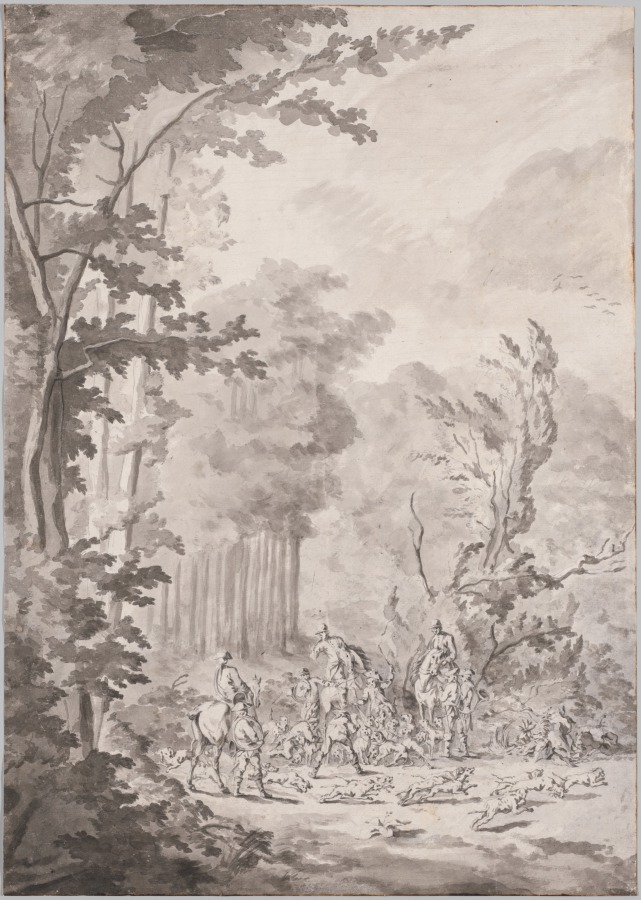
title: A Hunting Party at Marly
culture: France, 17th-18th century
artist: attributed to Jean Baptiste Martin, Le Vieux (French, 1659–1735)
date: late 17th or early 18th century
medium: Graphite and gray washes; framing lines in brown ink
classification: Drawing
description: This drawing represents a royal hunt like those known to have taken place at King Louis XIV’s hunting lodge at Marly, located just outside of Paris. Dwarfed by enormous trees, men on foot and horseback, accompanied by musicians carrying French horns, prepare themselves for a hunt while a pack of dogs run in excitement of chasing their prey.